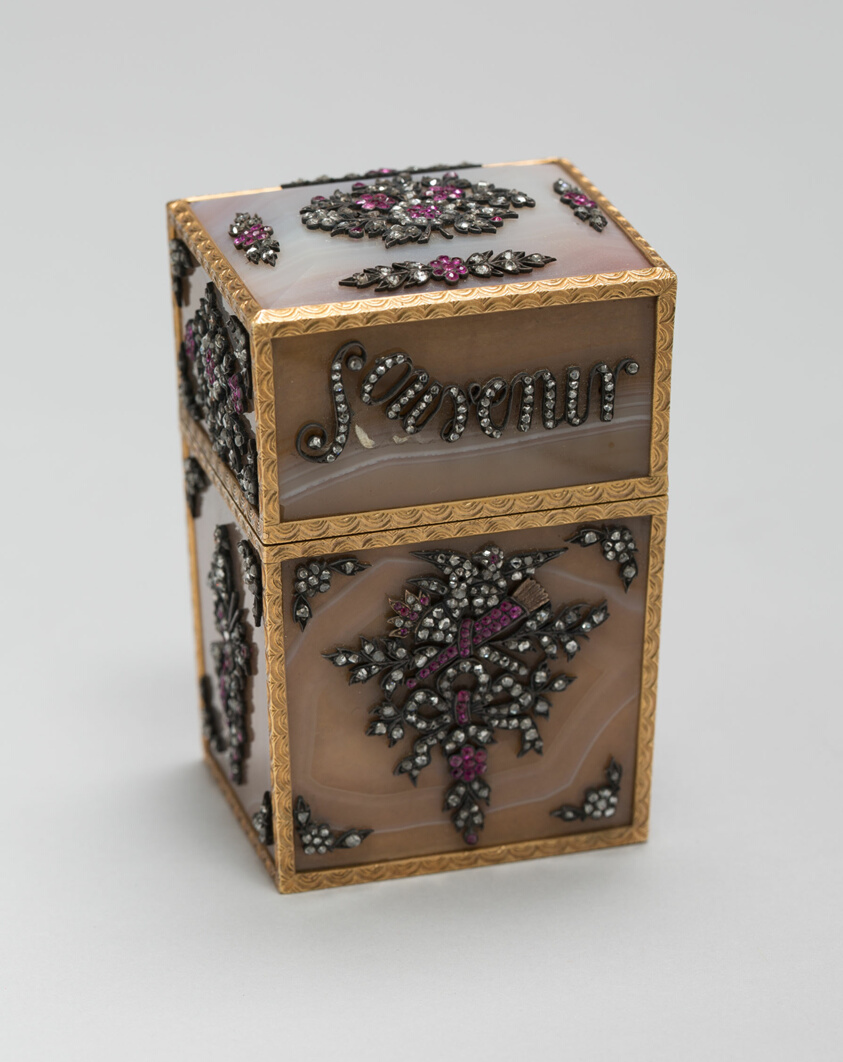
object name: Metalwork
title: Etui Box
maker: Probably England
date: 1750/99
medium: Gold, steel, porcelain, crystal, velvet, and silver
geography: England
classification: snuff box; european decorative arts; metalwork